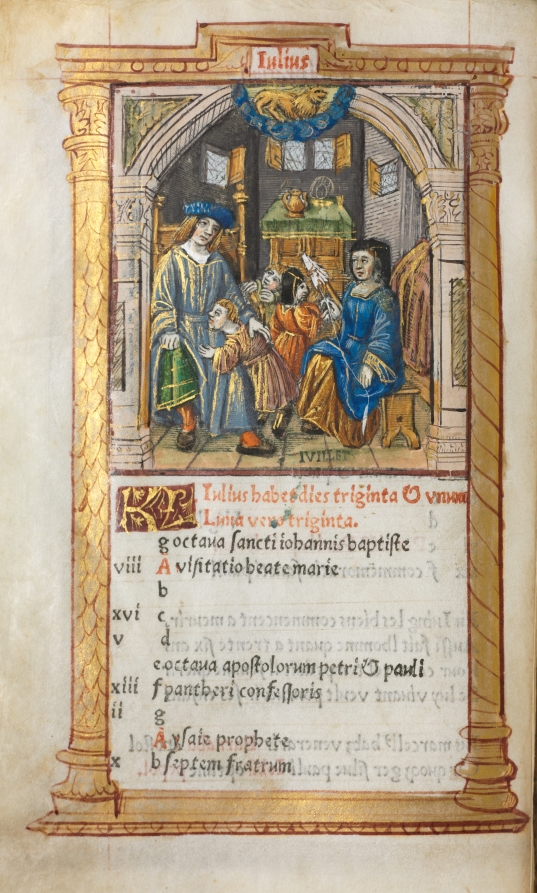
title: Printed Book of Hours (Use of Rome): fol. 8v, July calendar illustration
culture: France, Paris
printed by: Guillaume Le Rouge (French, Paris, active 1493–1517)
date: 1510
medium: 112 Printed folios on parchment, bound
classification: Bound Volume